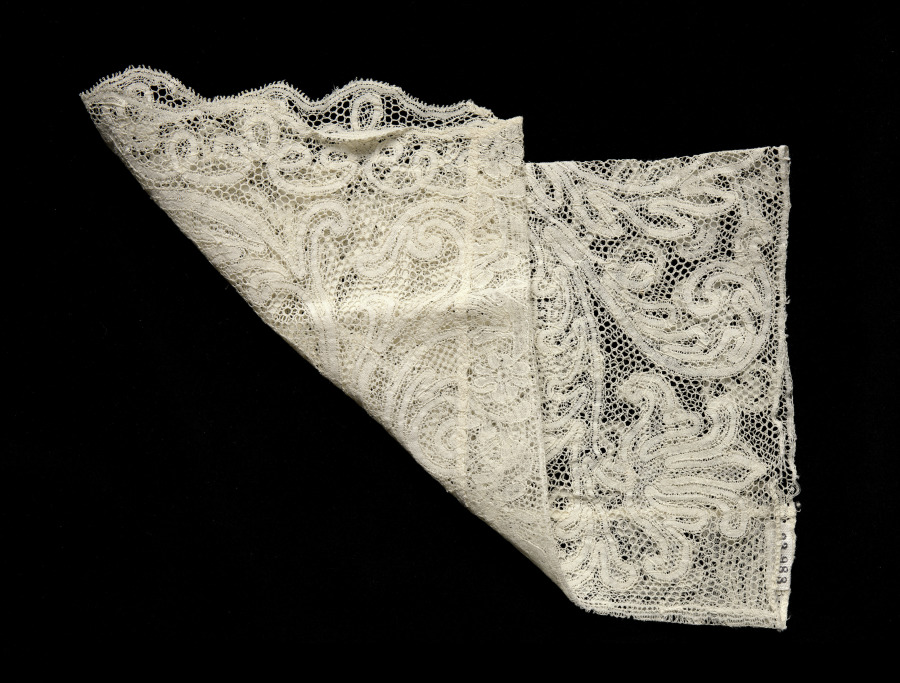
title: Lace Cuff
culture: Italy, Milan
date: 1600s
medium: Bobbin lace (Punto di Milano)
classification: Lace